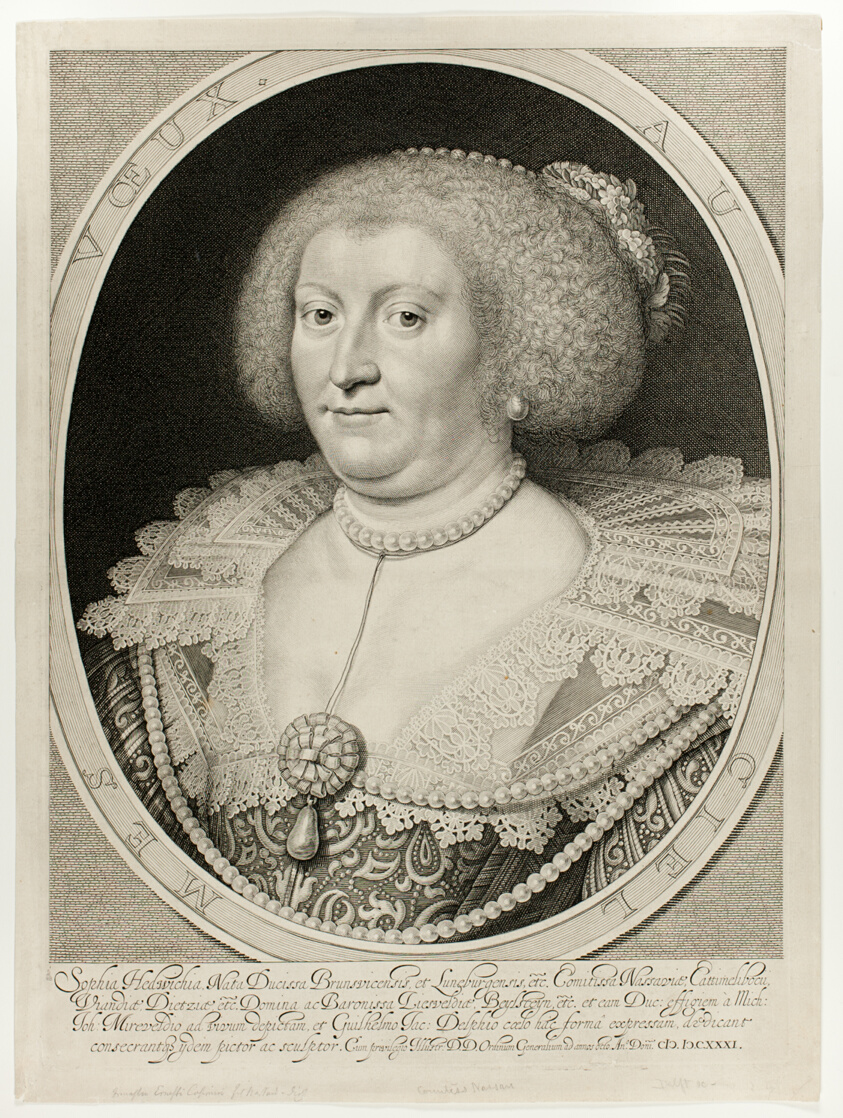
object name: Print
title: Sophia Hedwichia, Countess of Nassau-Dietz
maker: William Jacobsz. Delff (Dutch, 1580-1638); after Michiel Jansz. van Mierevelt (Dutch, 1567-1641)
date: 1631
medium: Engraving in black on ivory laid paper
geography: Netherlands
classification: engraving; prints and drawing; print